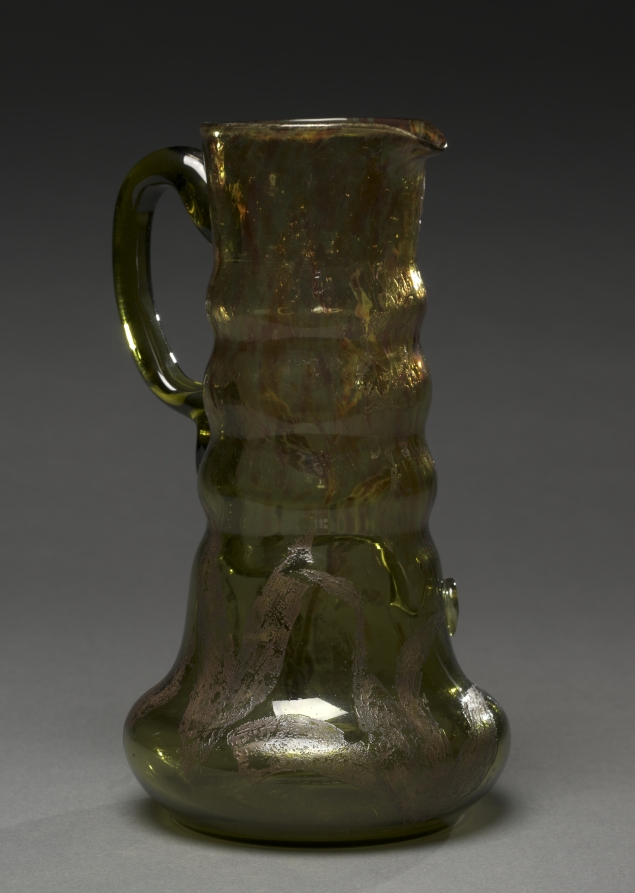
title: Pitcher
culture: France, late 19th Century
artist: Emile Gallé (French, 1846–1904)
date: c. 1890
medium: applied glass and enamel decoration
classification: Glass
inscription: etched on bottom: "Cristallerie/d'Emile Gallé/modele et decor deposes."